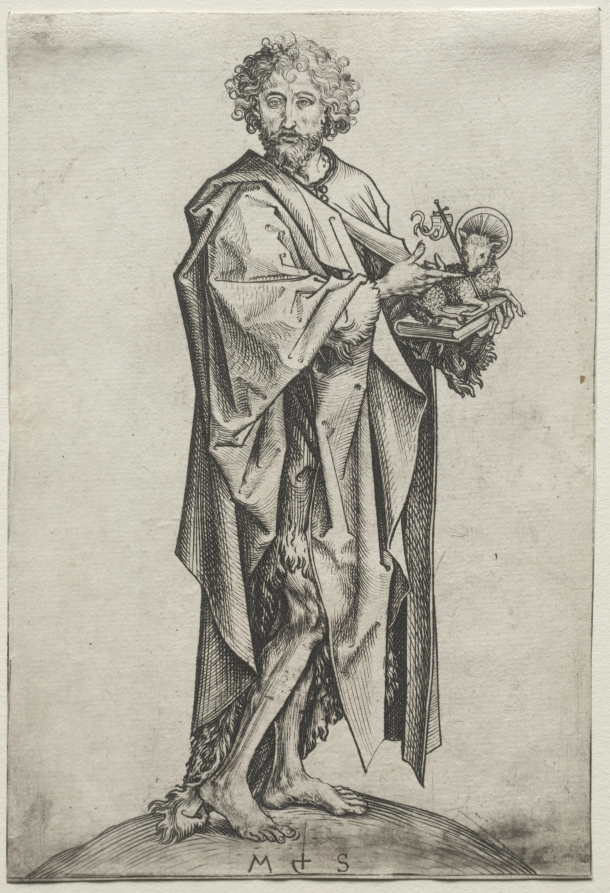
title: St. John the Baptist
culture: Germany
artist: Martin Schongauer (German, c. 1450–1491)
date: c. 1475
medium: engraving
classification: Print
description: Martin Schongauer was among the first artists to work extensively in engraving to create series such as the one depicting the saints. Here, he represented Saint John the Baptist as a thin ascetic man holding a book at the top of which is the Lamb of God. Schongauer's engraved lines inventively emulate different natural qualities and textures, for example the camel fur of John's robe and the spiraling locks of his hair.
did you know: In his gospel, Saint John identifies Christ as the "Lamb of God," and so the saint is often portrayed holding a lamb with a cruciform staff, symbolizing Christ victorious over death.